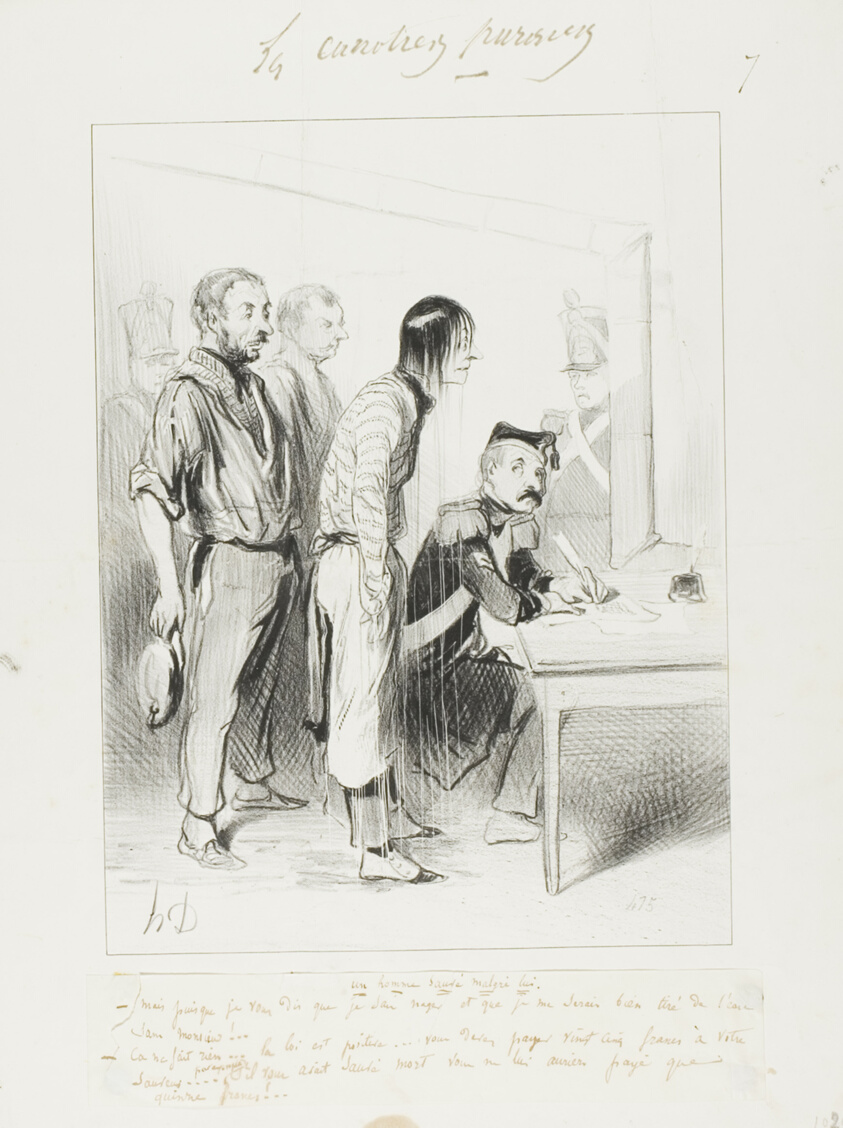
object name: Print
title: A Man Saved Against his Will, plate seven from Les Canotiers Parisiens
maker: Honoré-Victorin Daumier (French, 1808-1879)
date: 1843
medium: Lithograph in black, with additions in pen and brown ink (discolored to grayish brown) and caption in pen and brown ink, on ivory wove paper, tipped onto ivory wove paper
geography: France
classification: lithograph; print; prints and drawing